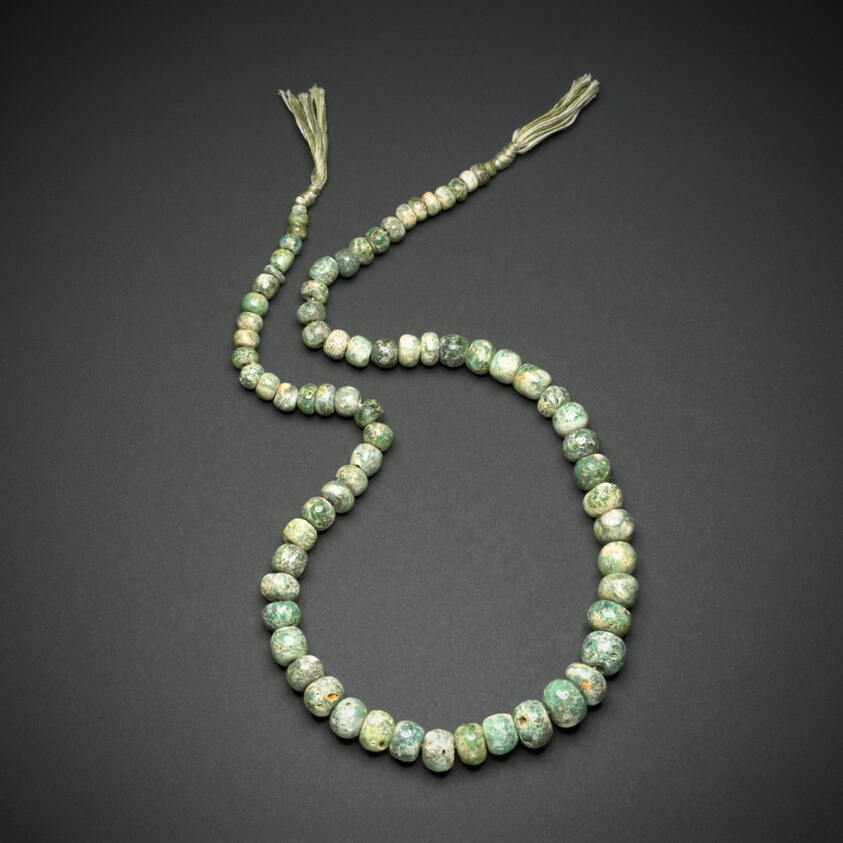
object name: Costume and Accessories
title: Necklace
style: colima, mesoamerican, Pre-Columbian, americas, jalisco, west mexico, Arts of the Americas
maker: Colima or Jalisco; Colima or Jalisco, Mexico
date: 200 BCE–200 CE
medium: Greenstone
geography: Western Mexico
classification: bead; necklace; art of the americas; jewelry; costume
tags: jewelry, status, fertility, maize